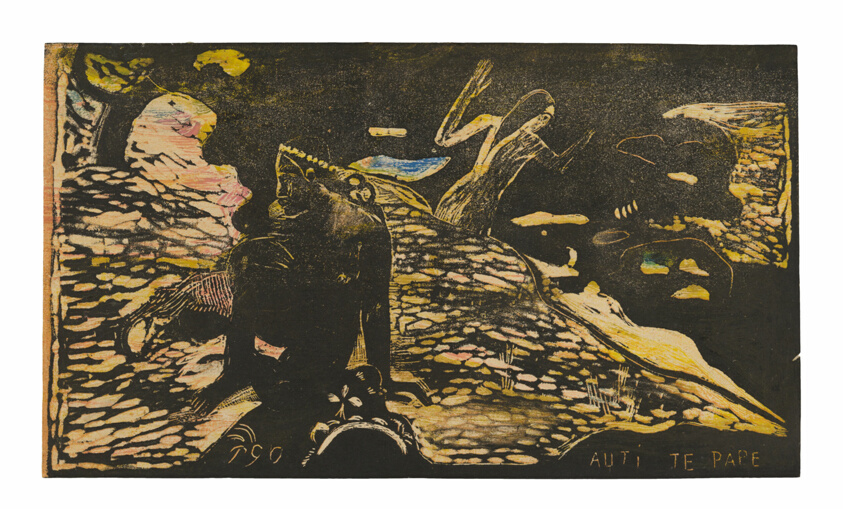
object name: Print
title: Auti te pape (Women at the River), from the Noa Noa Suite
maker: Paul Gauguin (French, 1848-1903)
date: 1893/94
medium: Wood-block print, printed twice in pale orange and black ink, over transferred yellow, pink, orange, blue and green oil-based media, with traces of conifer resin (probably pine resin), on cream wove Japanese paper, laid down on cream wove Japanese paper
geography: France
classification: woodcut; print; prints and drawing